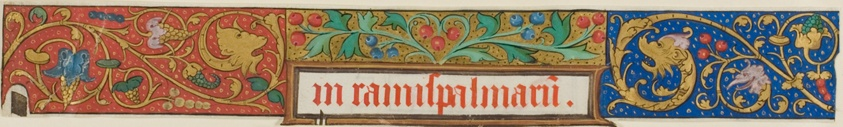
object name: Drawing and Watercolor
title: Illuminated Border with Grotesques, Grapes and Berries from a Manuscript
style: medieval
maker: French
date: 15th or early 16th century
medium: Manuscript cutting in tempera and gold leaf, with Latin inscription in gothic in red ink, on vellum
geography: France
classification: tempera; manuscript; drawings (visual works); prints and drawing